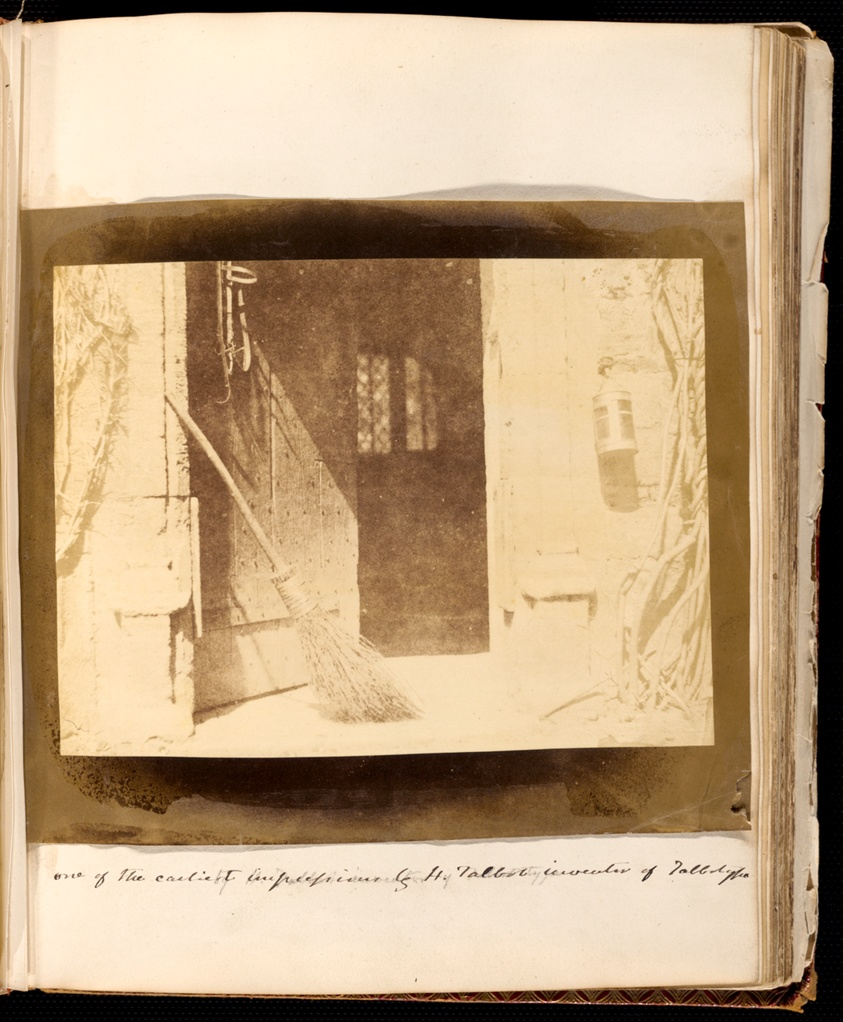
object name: Photograph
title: Untitled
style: 19th century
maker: William Henry Fox Talbot (English, 1800–1877)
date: 1844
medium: Salted paper, from the "Untitled Album"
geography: England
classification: photograph; photography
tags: Collected by Hugh Edwards